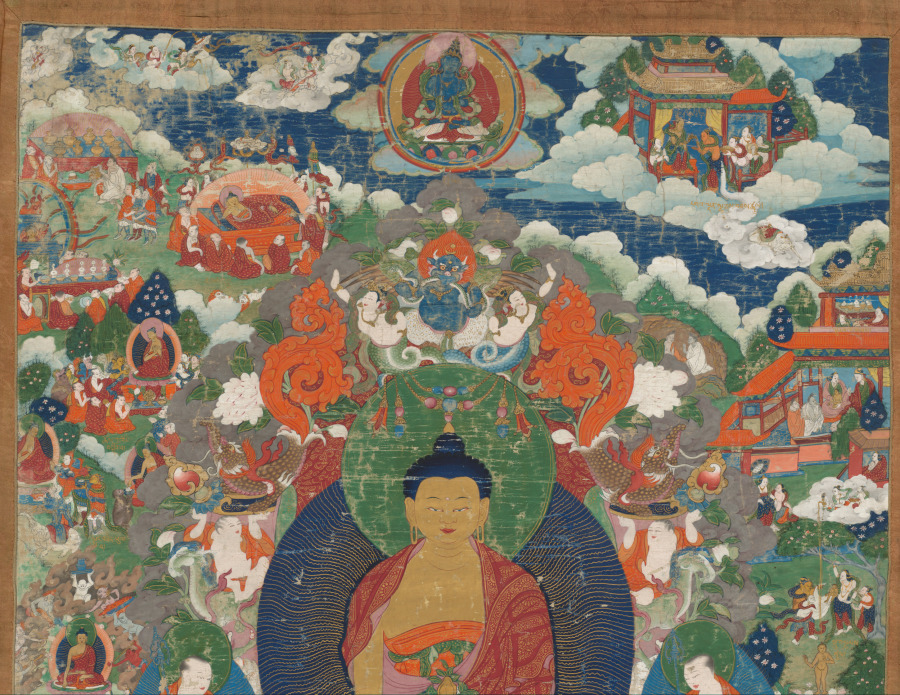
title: Shakyamuni Buddha with scenes from his life story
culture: Tibet, Qing dynasty (1644–1911)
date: c. 1700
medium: gum tempera on cloth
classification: Painting